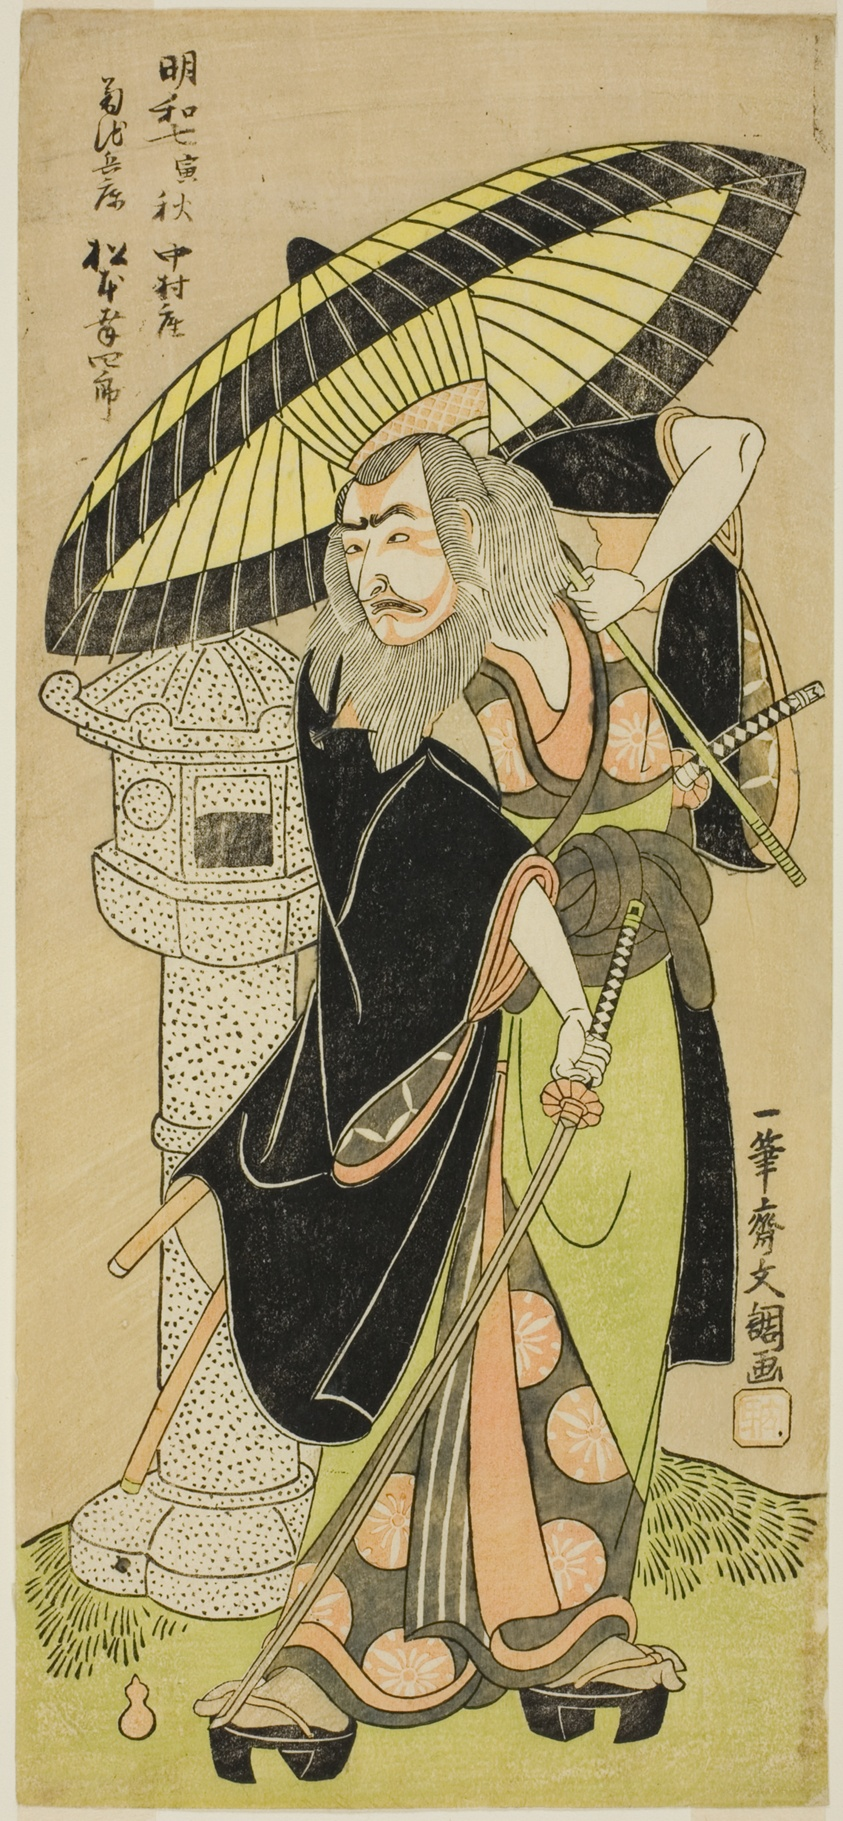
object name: Print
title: The Actor Matsumoto Koshiro III as Kikuchi Hyogo Narikage in the Play Katakiuchi Chuko Kagami (Vendetta: A Model of Loyalty and Filial Duty), Performed at the Nakamura Theater from the Fifth Day of the Sixth Month, 1770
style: Japanese (culture or style)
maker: Ippitsusai Buncho; Japanese, active c. 1755-90; Publisher: okumura Genroku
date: c. 1770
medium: Color woodblock print; hosoban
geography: Japan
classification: woodblock print; print; asian art